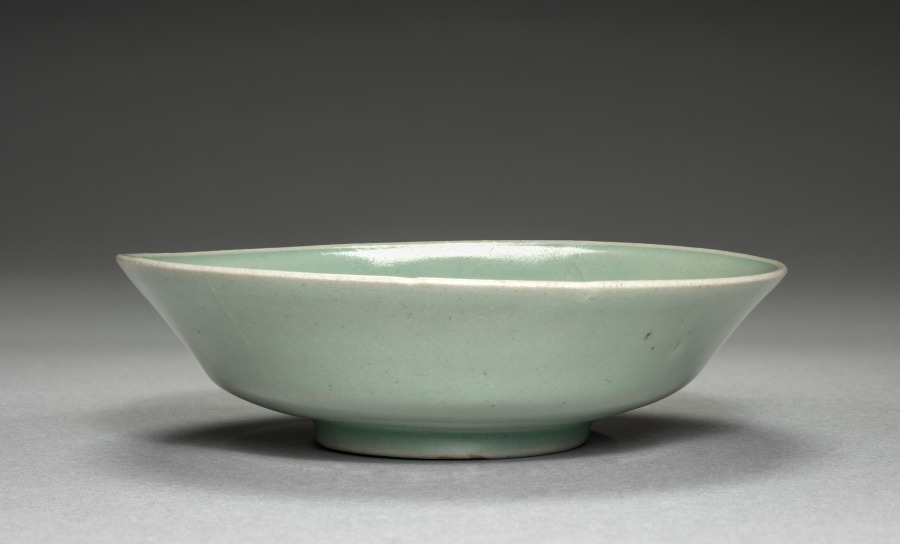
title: Dish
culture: Korea, Goryeo dynasty (918–1392)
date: 1100s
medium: glazed porcelain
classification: Ceramic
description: Celadon wares used for everyday such as this dish were among the most common burial objects in tombs during the Goryeo period (918–1392). Furnishing tombs with an elaborate assemblage of objects was believed to honor and comfort the newly dead. Generally, Goryeo tombs were left untouched until the late 1800s. During the colonial period (1910–45), however, Japanese archaeologists competitively excavated the tombs located in Kaeseong, the former capital of the Goryeo period, and soon became available for Japanese and Western collectors.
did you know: The pale bluish glaze indicates that this dish was created in the 1100s, when the production of celadon reached its technical peak.